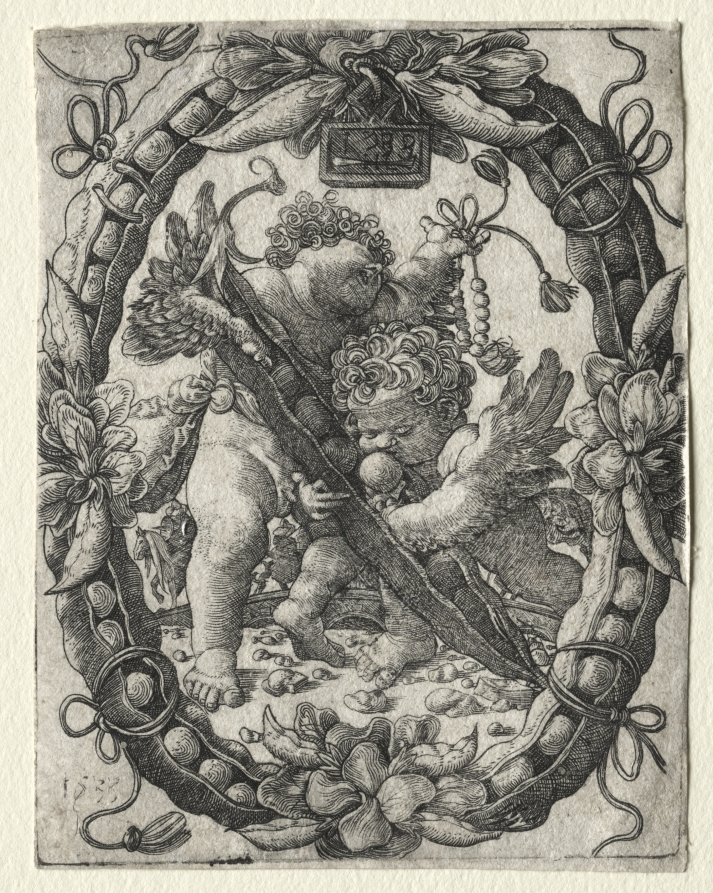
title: The Pea Pod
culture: Germany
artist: Master H. L. (German)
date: 1533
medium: engraving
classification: Print